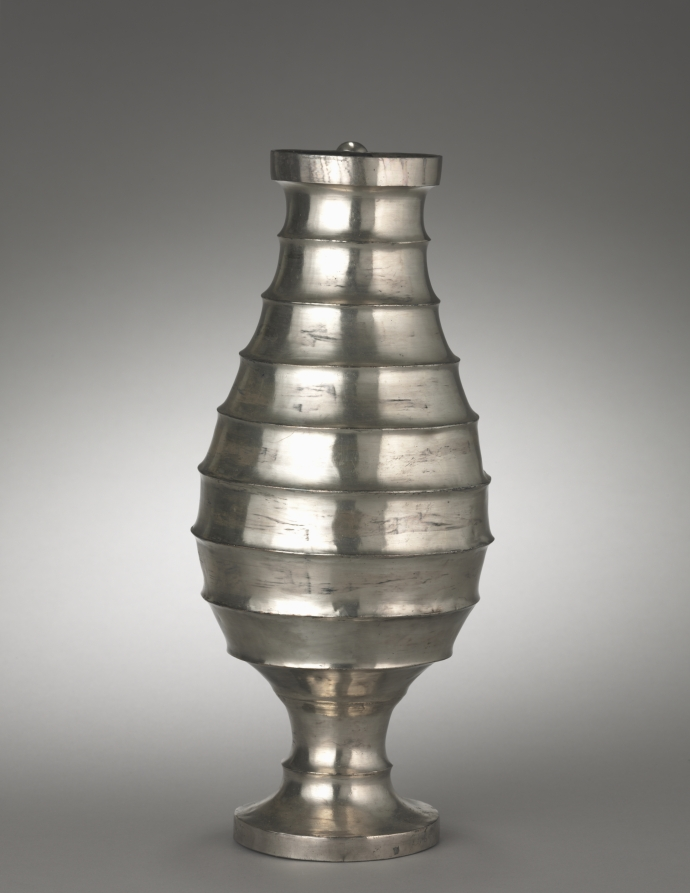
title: Stepped Pitcher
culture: Iran, Sasanian Empire (224–651 CE)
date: 400–600 CE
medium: silver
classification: Metalwork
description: The Sasanians are best known today for their expert work in silver. This museum is fortunate to have one of the most important collections of Sasanian silver vessels in the world.